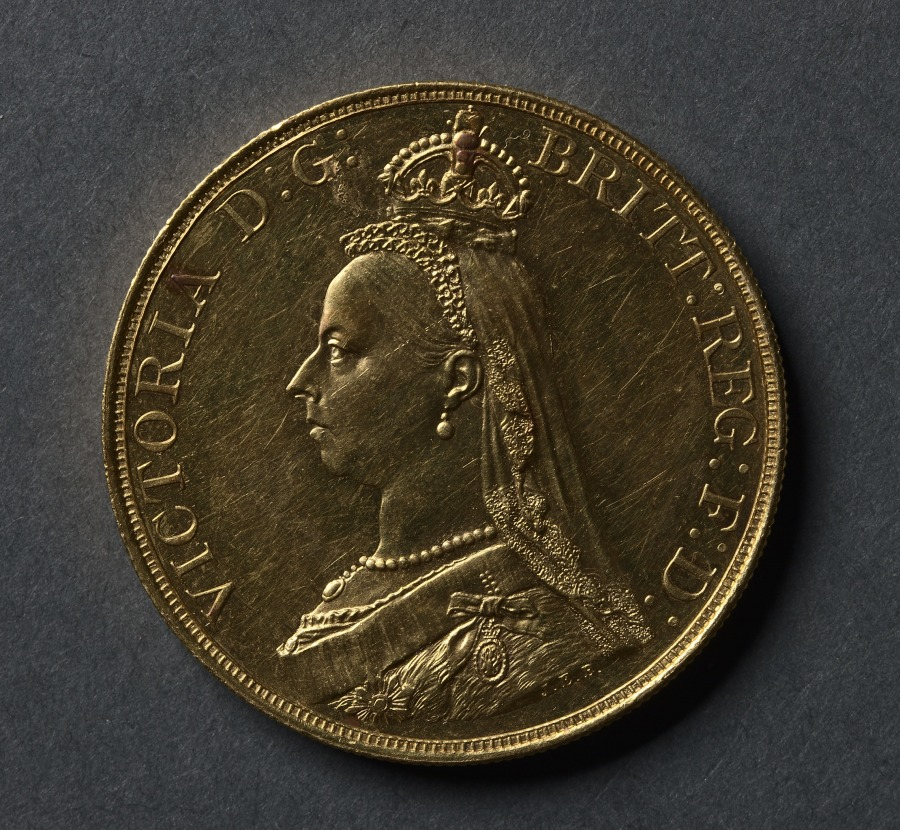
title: Five Pound Piece: Victoria (obverse); St. George and the Dragon (reverse)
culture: England, Victoria, 1837-1901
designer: after Benedetto Pistrucci (Italian, 1784–1855)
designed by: Joseph Boehm (British, 1834–1890)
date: 1887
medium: gold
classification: Coins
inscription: VICTORIA D: G: BRITT: REG: F: D:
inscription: 1887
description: The obverse design of this piece is usually known as the "Jubilee head," since 1887, the year of its production, was the Golden Jubilee of Queen Victoria. By Sir Joseph Boehm, R.A., sculptor in ordinary to the queen, it caused a minor storm since it was said the tiny crown made the queen look ridiculous. The queen is said not to have liked the design herself, but she did in fact wear a small crown of this type when she began to find the full-size crown too heavy. The crown may be seen among the Crown Jewels at the Tower of London.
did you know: This piece was not made for circulation but was part of a proof set.